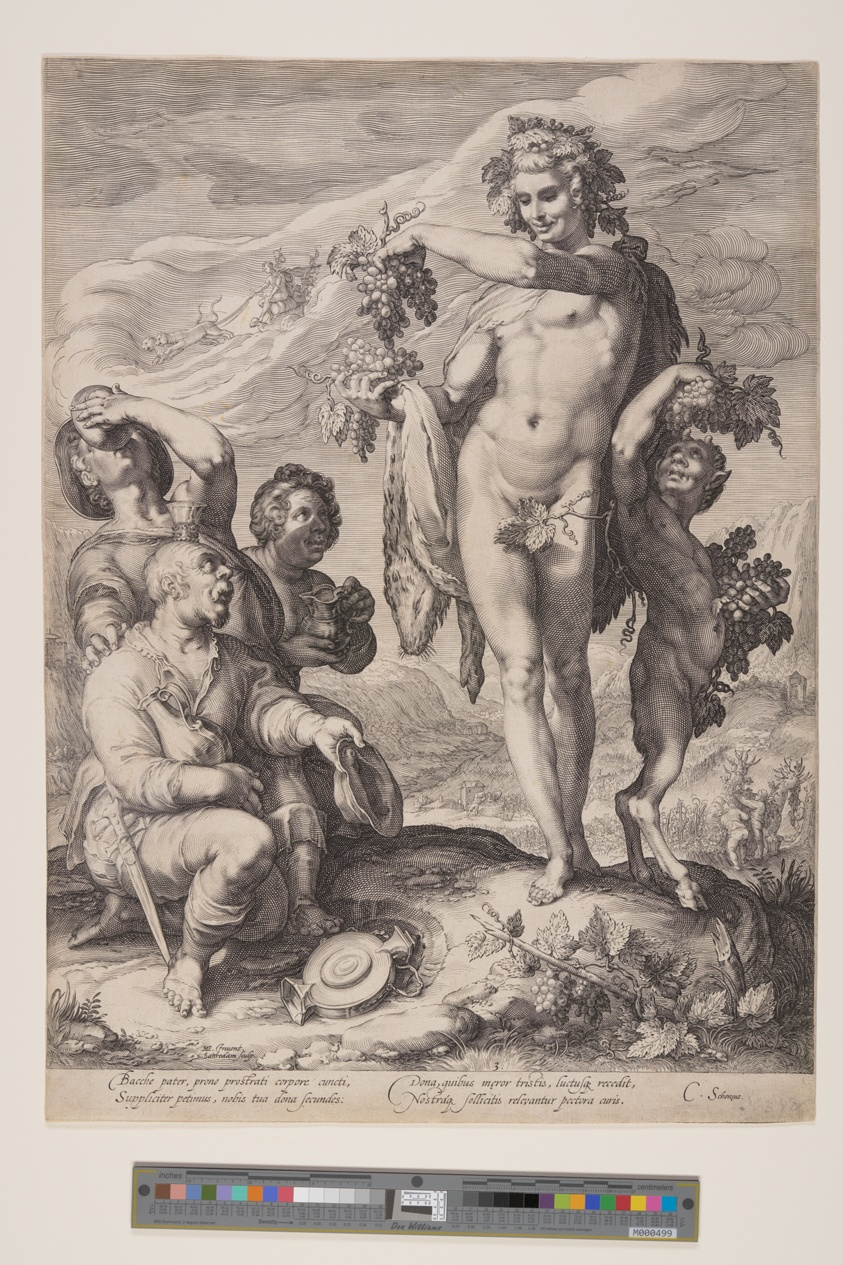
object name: Print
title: Homage Paid to Bacchus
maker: Jan Saenredam (Dutch, 1565–1607); after Hendrick Goltzius (Dutch, 1558–1617)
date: 1596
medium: Engraving on ivory laid paper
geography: Netherlands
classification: engraving; paper; print; prints and drawing